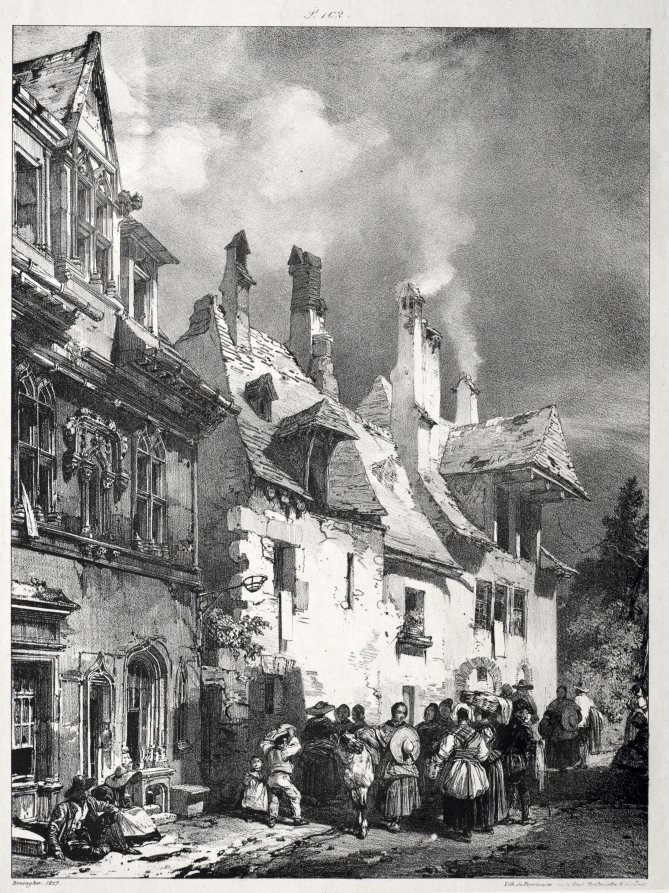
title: Street in the Outskirts of Besançon, France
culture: England, 19th century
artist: Richard Parkes Bonington (British, 1802–1828)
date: 1827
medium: lithograph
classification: Print